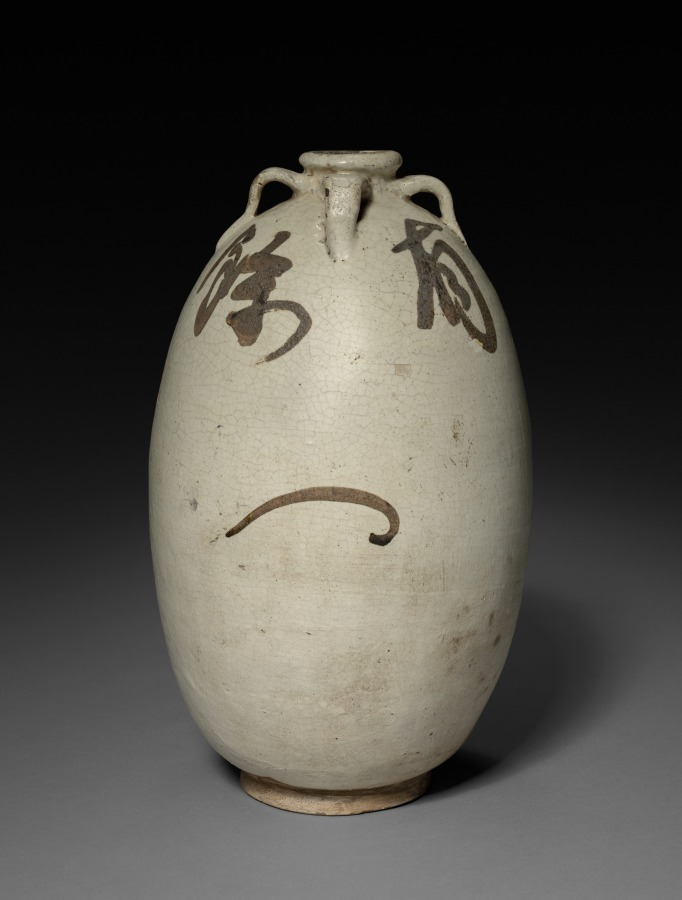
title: Wine Jar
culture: China, Yuan dynasty (1271-1368)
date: 1271–1368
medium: Glazed stoneware; Cizhou ware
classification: Ceramic